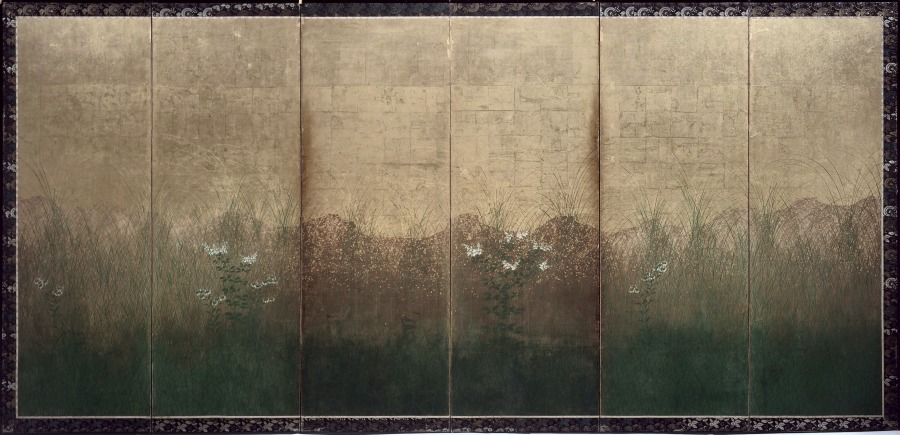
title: Autumn Evening with Full Moon on Musashino Plain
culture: Japan, Edo period (1615–1868)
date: early 1600s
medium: One of a pair of six-fold screens; ink, color, and gold and silver foil on gilded paper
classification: Painting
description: Tall grasses and autumn flowers reach out of thick green undergrowth in this depiction of the plain of Musashi, a site famous from classical Japanese poetry. A silver disc, now tarnished, represents the full moon. Flecks of cut-gold foil in the sky evoke the day’s passage into night. Once a wilderness with a vast horizon, Musashi is now densely populated.